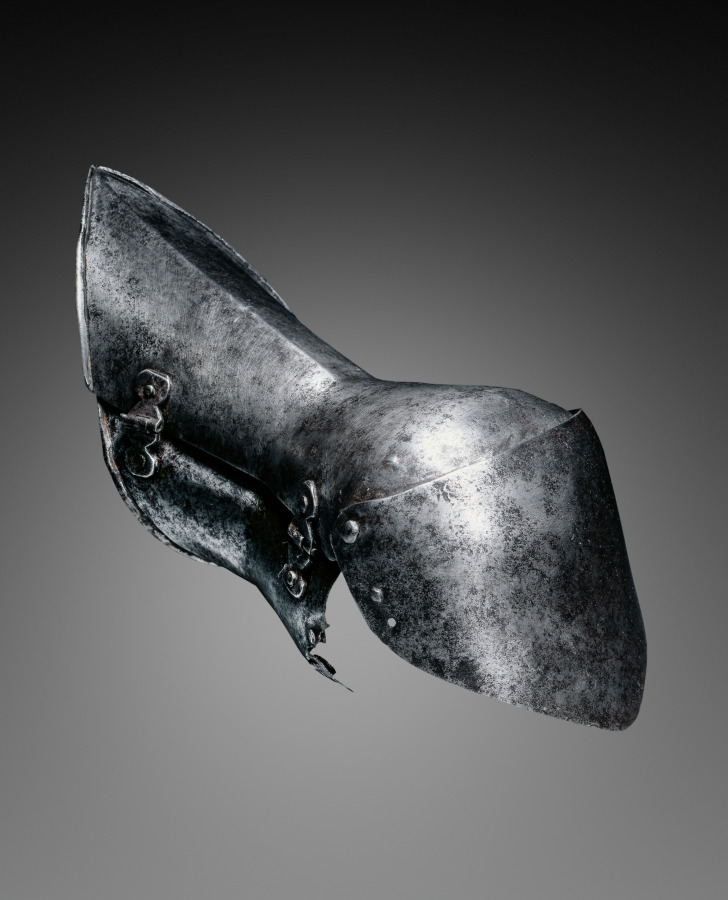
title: Gothic Mitten Gauntlet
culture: Italy, 15th century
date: c. 1450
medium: steel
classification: Arms and Armor